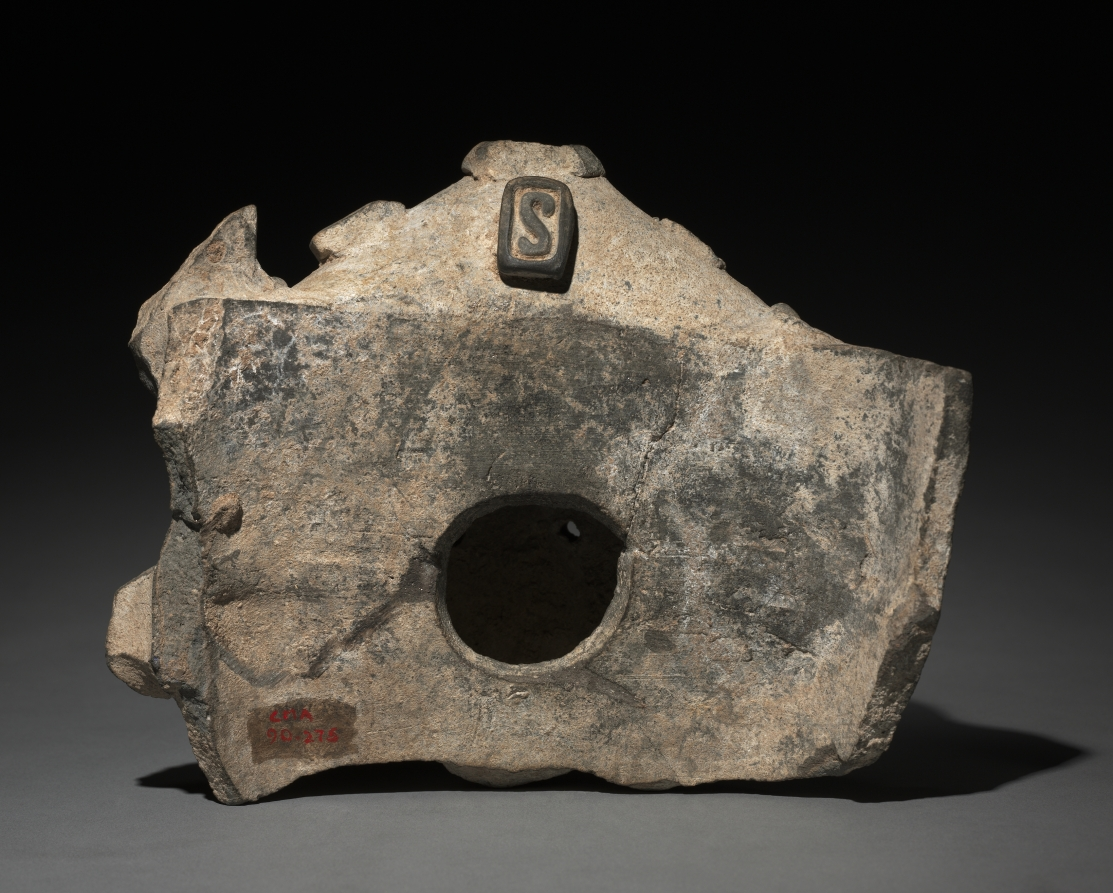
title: Urn Figure Head Fragment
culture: Mexico, Oaxaca, Zapotec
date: c. 200–500 CE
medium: earthenware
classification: Sculpture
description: The face of this fragmentary urn figure is modeled with exceptional sensitivity. The downward gaze of the drilled pupils imparts a sense of quiet alertness.